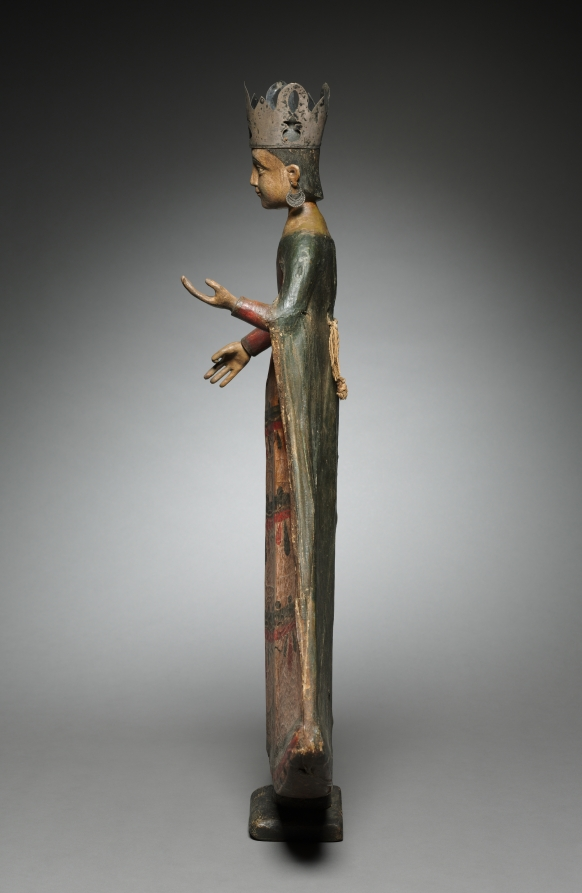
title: Santos: Virgin Crowned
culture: America, New Mexico, 19th century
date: 1800s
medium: painted wood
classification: Sculpture